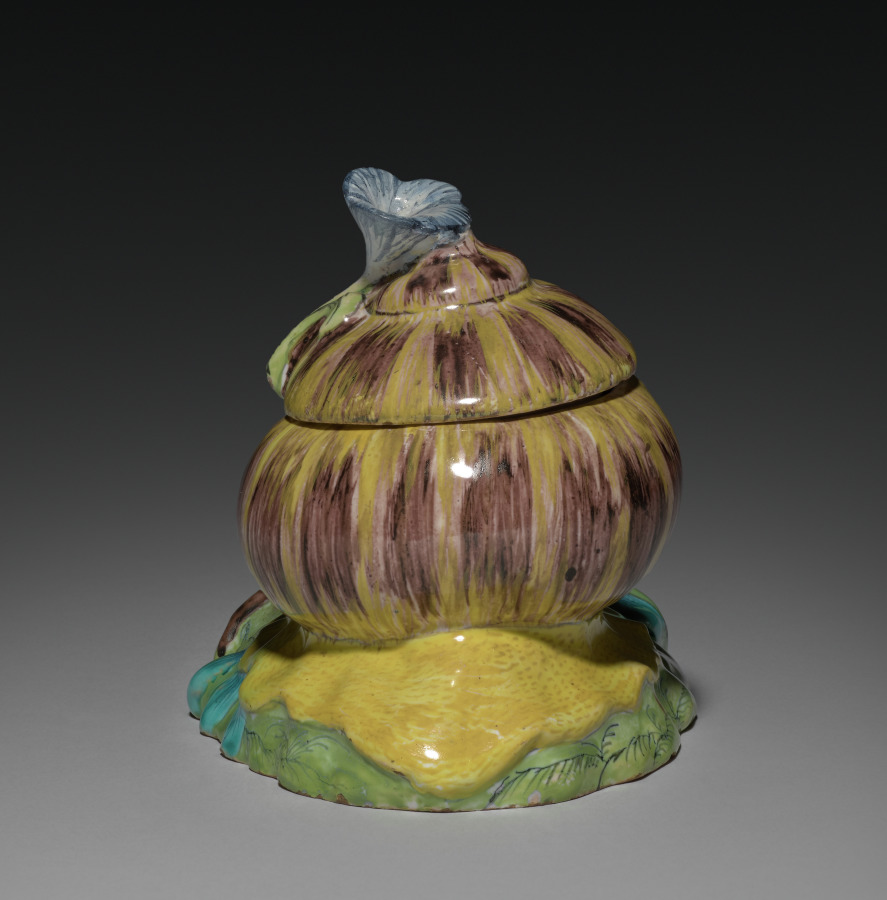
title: Covered Box in the Form of a Snail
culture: France, 18th century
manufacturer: Strasbourg Factory (France)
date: c. 1750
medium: faience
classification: Ceramic